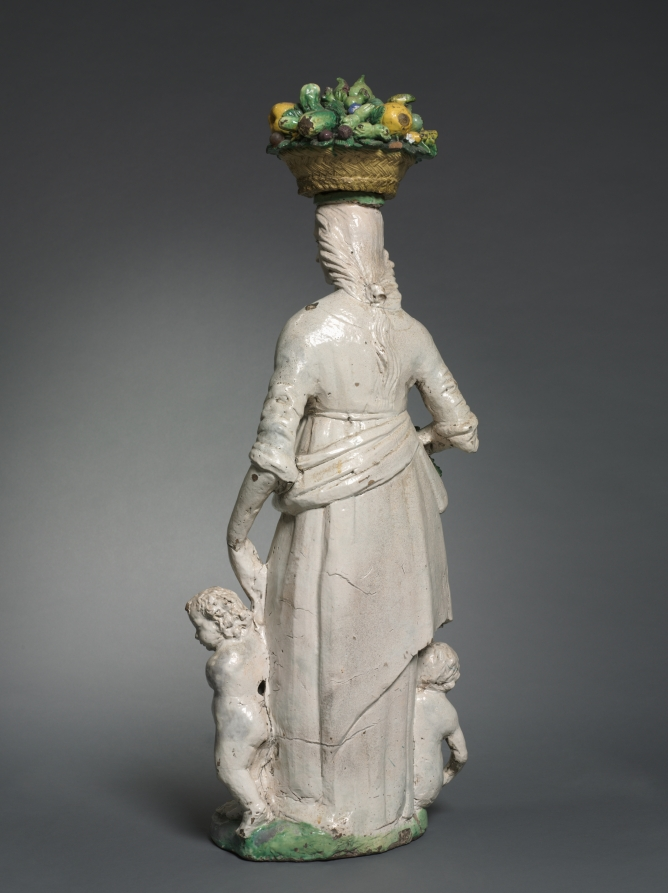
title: Dovizia (Plenty)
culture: Italy, Florence, 16th century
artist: Giovanni della Robbia (Italian, 1469–1529/30)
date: c. 1520–29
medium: glazed terracotta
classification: Sculpture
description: Many elite Florentine Renaissance homes had sculptures of idealized young women carrying nature’s bounty, such as this work. The motif stems from a statue by Donatello (about 1386–1466) that towered over Florence’s main public market. At home, however, the sculpture became a talisman for the family’s well-being. The city-state’s low birth rate was a serious political matter, and such a sculpture was believed to stimulate fertility while also promoting motherhood and bolstering financial success.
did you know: Inspired by an over life-sized, public sculpture by Donatello, Giovanni della Robbia reduced the figure for a domestic setting.